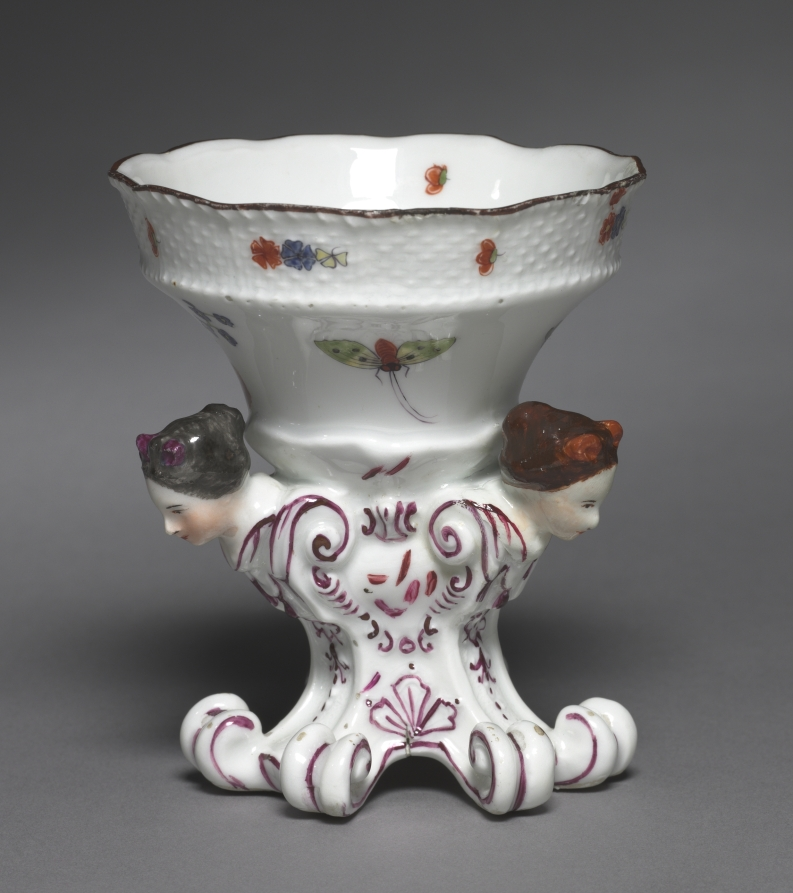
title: Salt Cellar from the Sulkowsky Service (1 of 2)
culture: Germany, Meissen, 18th century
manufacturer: Meissen Porcelain Factory (German, est. c. 1710)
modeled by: Johann Friedrich Eberlein (German, 1696–1749)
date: c. 1736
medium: hard-paste porcelain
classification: Ceramic